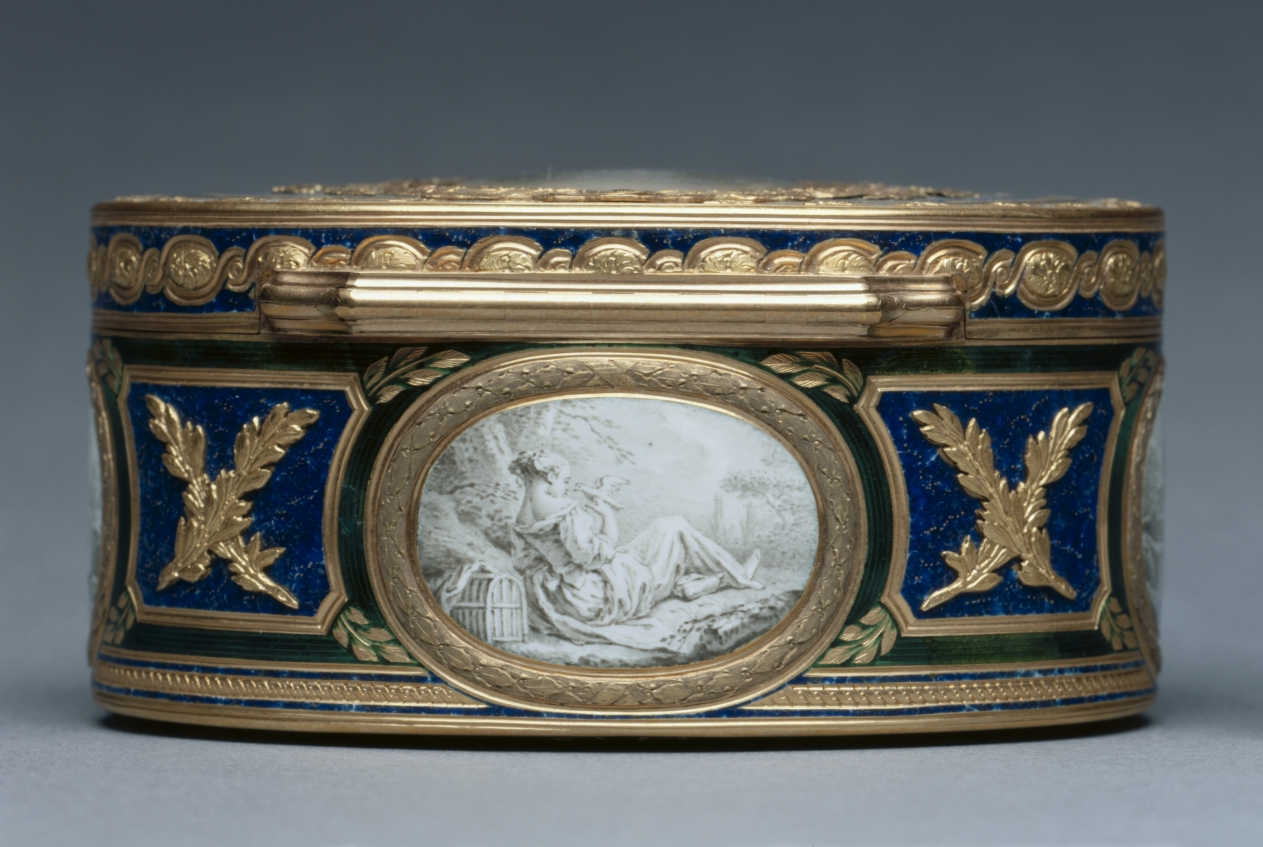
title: Snuff Box (Tabatière) with Portrait of Marie Antoinette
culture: France, 18th century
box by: Pierre-François-Mathis de Beaulieu (French)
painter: François Dumont (French, 1751–1831)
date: 1768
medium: watercolor on ivory in a gold and enamel box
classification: Enamel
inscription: [Maker's mark of Pierre-François-Mathis de Beaulieu, master goldsmith in 1768, inside cover]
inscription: [Charge mark of Jean-Jacques Prévot, 1762-1768, inside cover]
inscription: [Warden's mark of Paris, 1768-1769, inside cover]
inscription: [Discharge mark of Julien Alaterre, Paris, 1768-1774, on neck at right]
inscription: [Inside box, the letter]: "F"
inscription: [On bezel at left, engraved number]: "627"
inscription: [On front of bezel, engraved signature]: "Ve Georges Beaulieu à Paris"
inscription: [On right of miniature portrait, the letter]: "D"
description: This box was created through the collaboration of two skilled and well-known artisans of the period, master goldsmith Pierre-François-Mathis de Beaulieu and celebrated miniature painter François Dumont. The portrait of Marie Antoinette on the box's lid is painted in Dumont’s own style while those on the sides and bottom of the box take inspiration from the work of painter François Boucher, known for his pastoral scenes in the Rococo style.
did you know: Marie Antoinette, queen consort of French King Louis XVI and great patron of the decorative arts, was executed in 1793 at the end of the French Revolution.